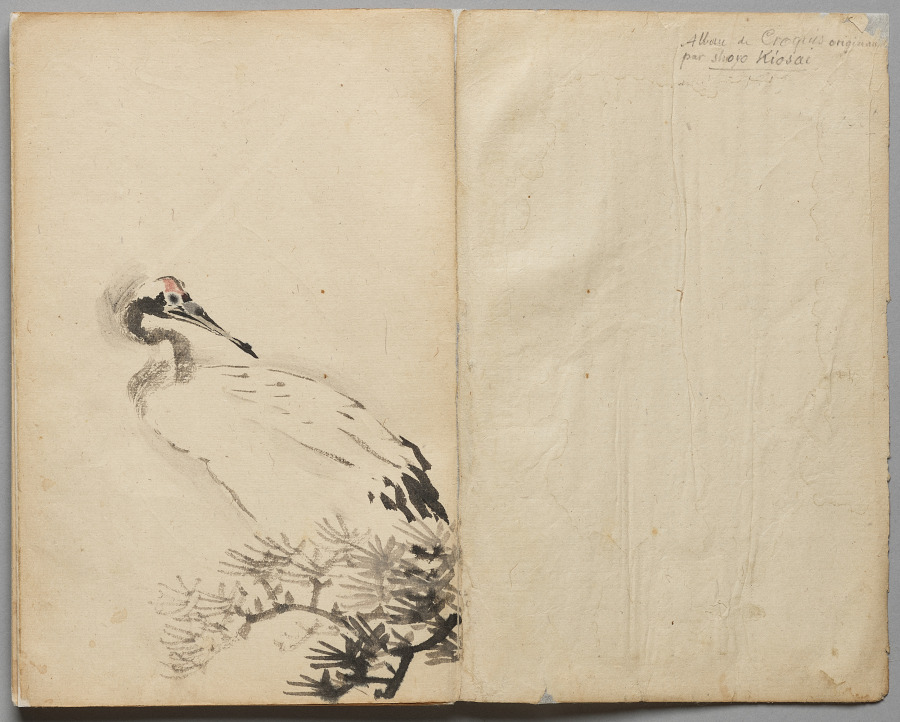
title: Crane from Sketch Album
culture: Japan, Edo period (1615–1868) to Meiji period (1868–1912)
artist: Kawanabe Kyōsai (Japanese, 1831–1889)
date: mid- to late 1800s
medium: Accordion-style book of 26 double-leaves; ink and color on paper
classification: Bound Volume